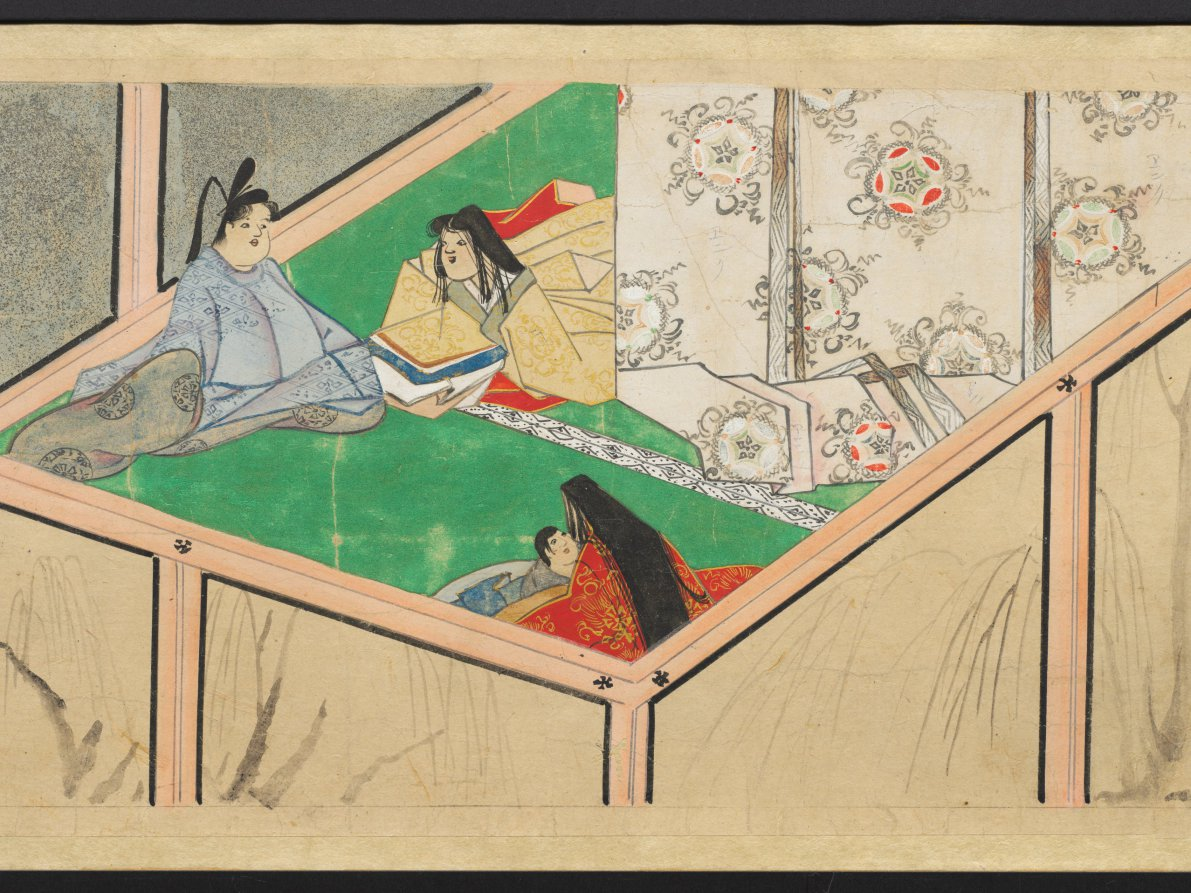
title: The Saltmaker's Story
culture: Japan, Edo period (1615–1868)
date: early 1600s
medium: One of a pair of handscrolls; ink, color, and gold on paper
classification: Painting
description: Once read and copied by girls at New Year’s celebrations and included in dowries, The Saltmaker’s Story is a rags-to-riches tale in which daughters are gifts from the gods. Despite his simple outlook, the main character progresses from humble roots as an associate at Kashima Shrine to the elite status of grandfather of the emperor through the intervention of the Kashima deity. The Saltmaker’s Story is traditionally presented in a set of three scrolls, but the text of this set has been removed by a previous owner, who remounted the illustrations as a pair. The paintings of this one take us from right to left through the second half of the tale.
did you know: This handscroll originally had texts before its paintings, but the texts were removed.